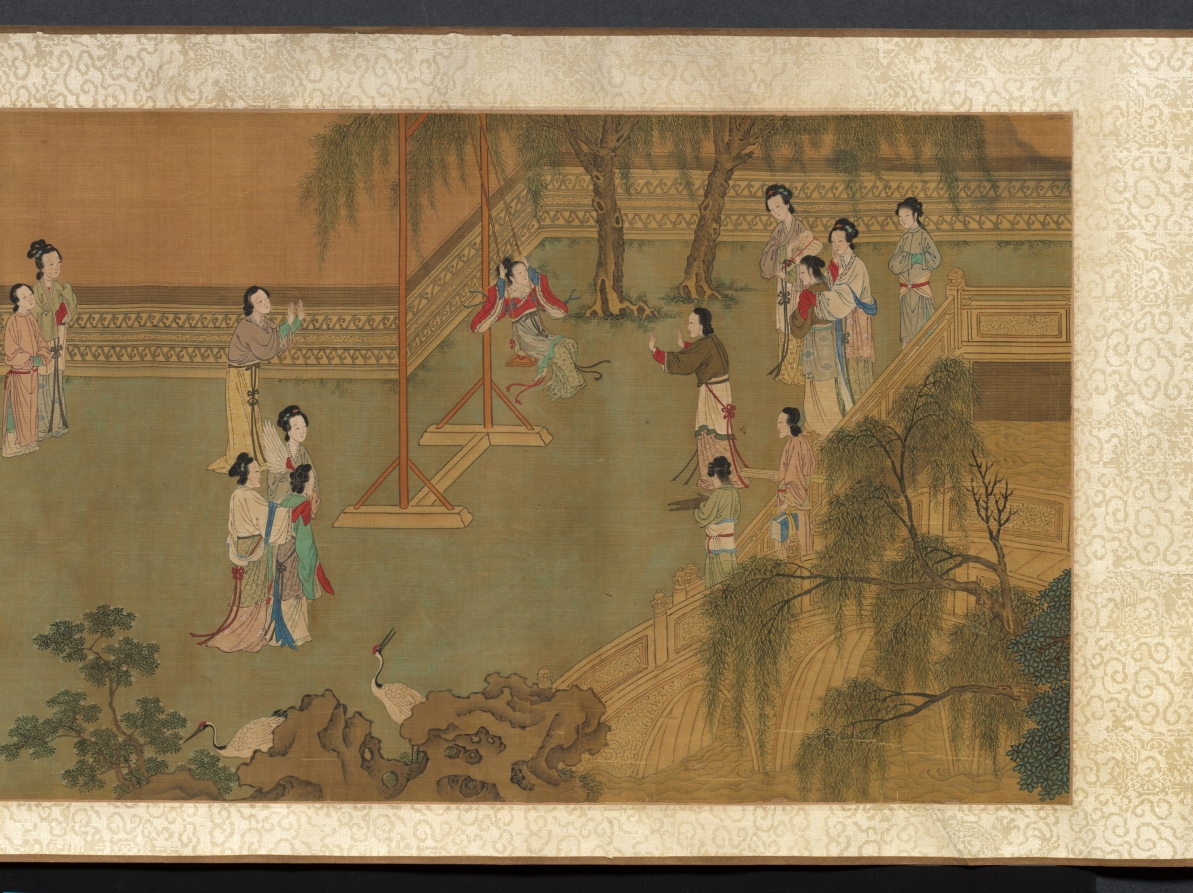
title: Palace Ladies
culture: China, Qing dynasty (1644-1911)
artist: copy after Qiu Ying (Chinese, 1494–1552)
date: 1644–1911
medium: handscroll, ink and color on silk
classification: Painting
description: This handscroll illustrates the pursuits of court ladies in a palace precinct on a spring day. Women, young girls, and their maids amuse themselves by sitting on a swing, playing games, watering and admiring peonies, performing music together, playing the qin (zither), feeding a parrot on the balustrade and fish in the water, or catching butterflies. The life of elite women was mostly restricted to the so-called inner quarters, meaning the garden and inner courts of the house. This painting idealizes the world of young palace girls that in fact was often filled with boredom and waiting for a lover.